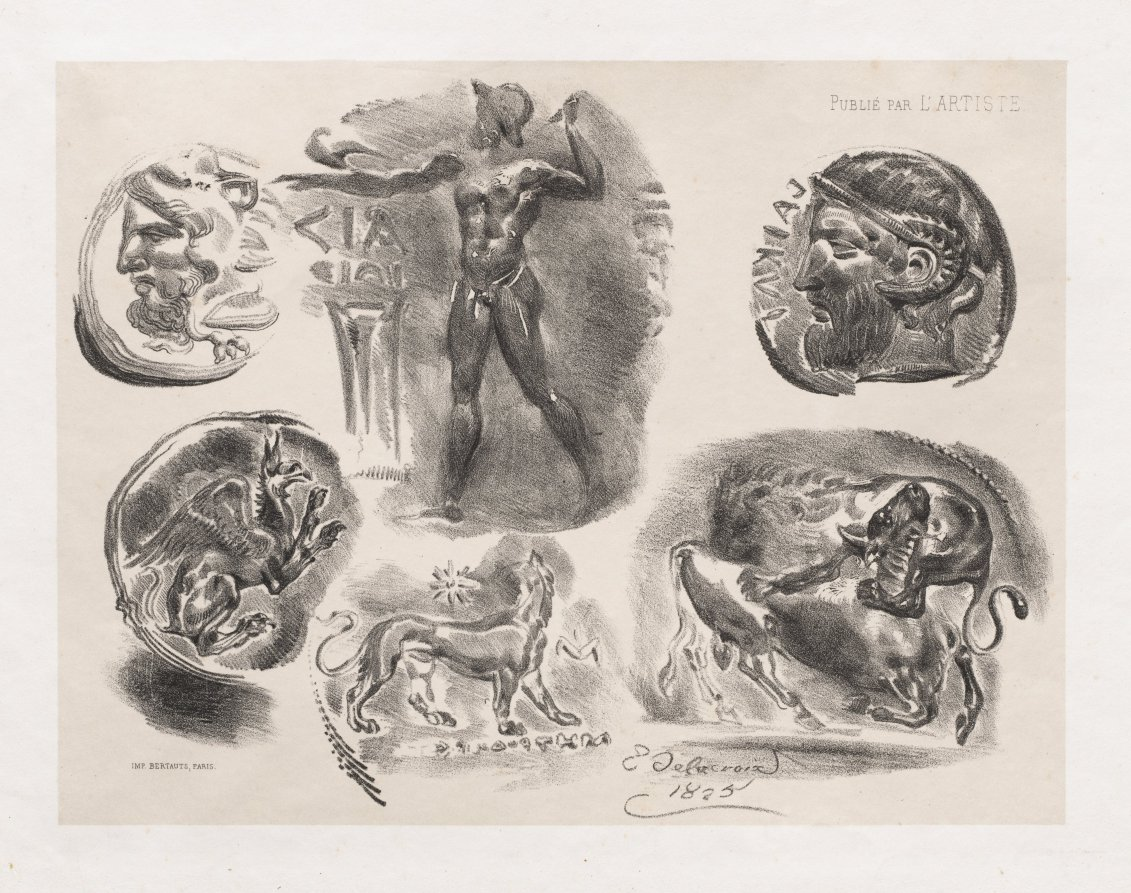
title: Sheet of Six Antique Coins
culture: France, 19th century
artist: Eugène Delacroix (French, 1798–1863)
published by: Published by the artist (September 15, 1865 issue)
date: 1825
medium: lithograph with tint stone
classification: Print